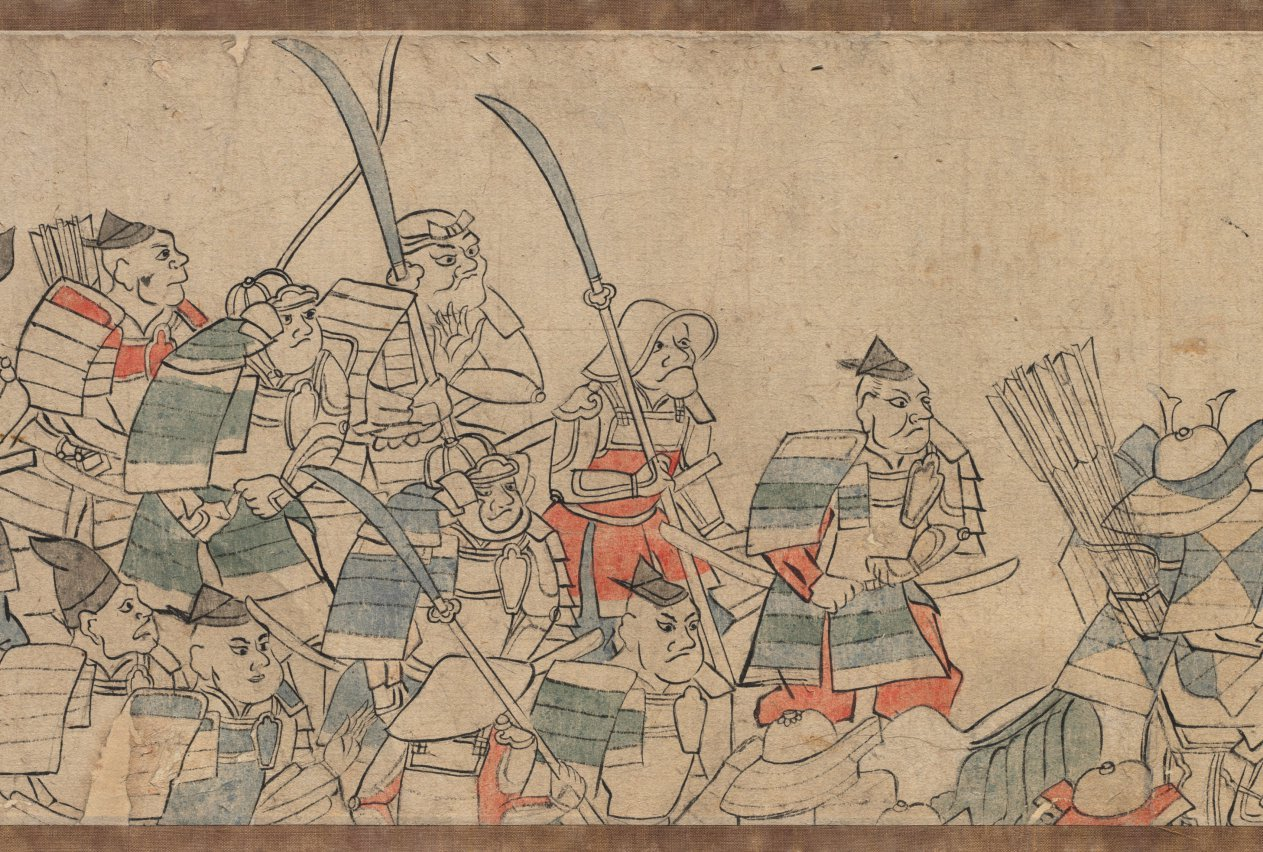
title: Oeyama Engi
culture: Japan, Edo period (1615–1868)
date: 1615–1868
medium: one of a pair of handscrolls; ink and color on paper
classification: Painting